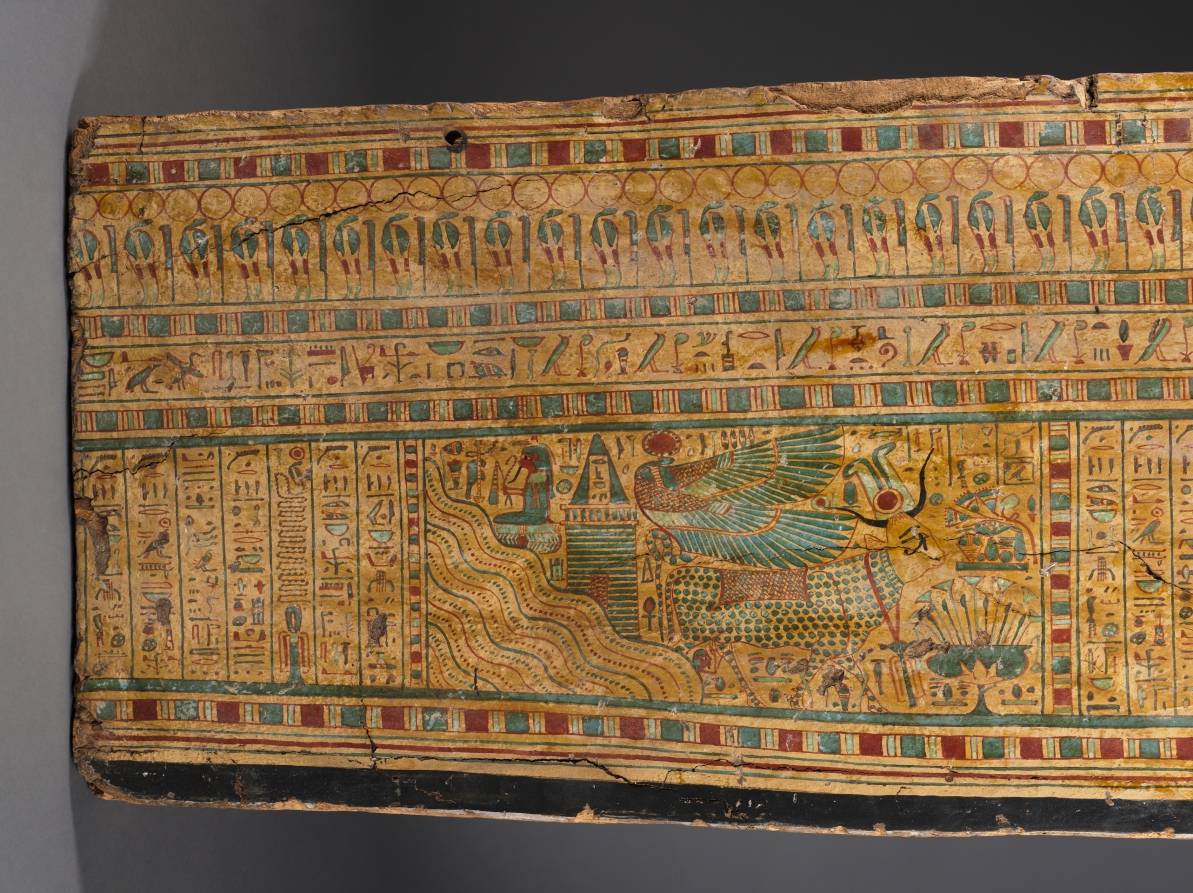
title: Coffin of Nesykhonsu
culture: Egypt, Thebes, Third Intermediate (1069–715 BCE), Dynasties 21–22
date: c. 976–889 BCE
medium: gessoed and painted sycamore fig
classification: Funerary Equipment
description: Egyptian coffins told stories and illustrated spells to help the deceased transition safely to the afterlife. Inside Nesykhonsu's coffin there are two jackals, one facing right and the other left, near the top. Here, the jackal represents the powerful deity Anubis, the god of the afterlife and embalming.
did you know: Two of Nesykhonsu's titles, "Lady of the House" and "Singer of the Choir of Mut the Great," are written on the outside of the coffin.